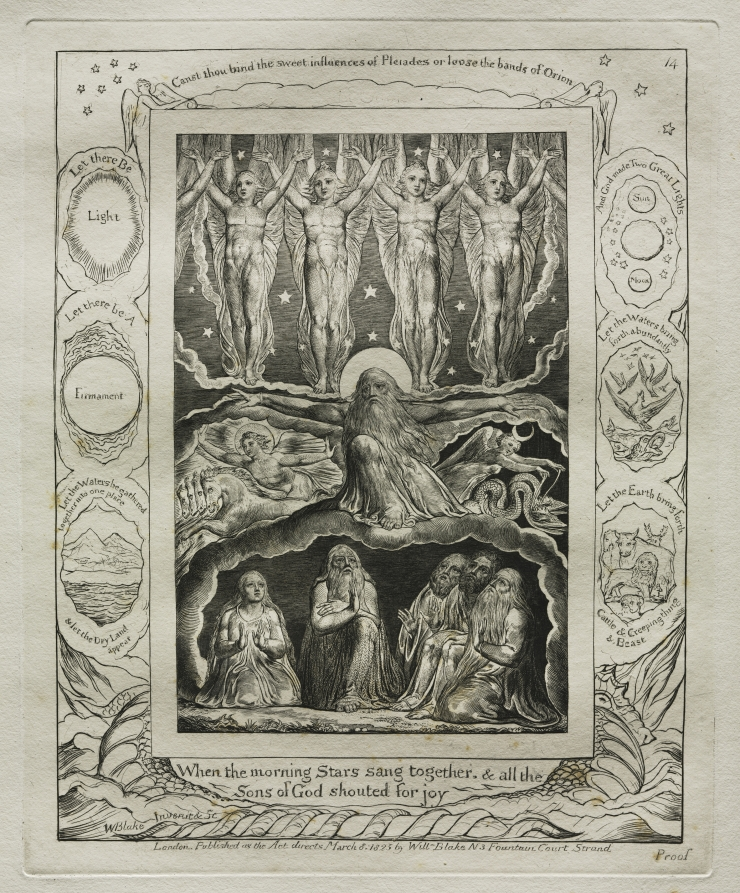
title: The Book of Job: Pl. 14, When the morning Stars sang together, and all the / Sons of God shouted for joy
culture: England, 18th century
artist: William Blake (British, 1757–1827)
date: 1825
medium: engraving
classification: Portfolio